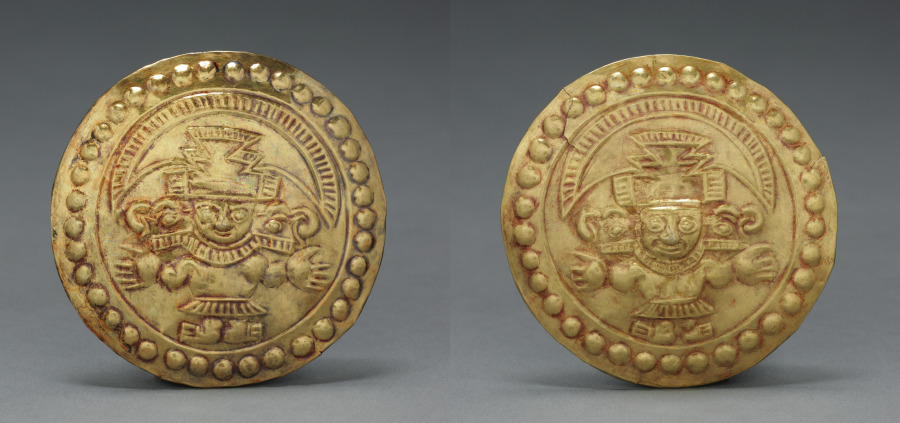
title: Pair of Ear Flare Frontals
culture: Peru, North Coast, Paramonga(?), Chimú style (900-1470)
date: Chimú style (900–1470)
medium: hammered gold alloy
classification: Jewelry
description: These gold discs, each with the image of a richly dressed Chimú lord, originally were attached to the fronts of ear ornaments equipped with long, thick shafts that passed through the ear lobes. Such ornaments were important markers of wealth and elite status.